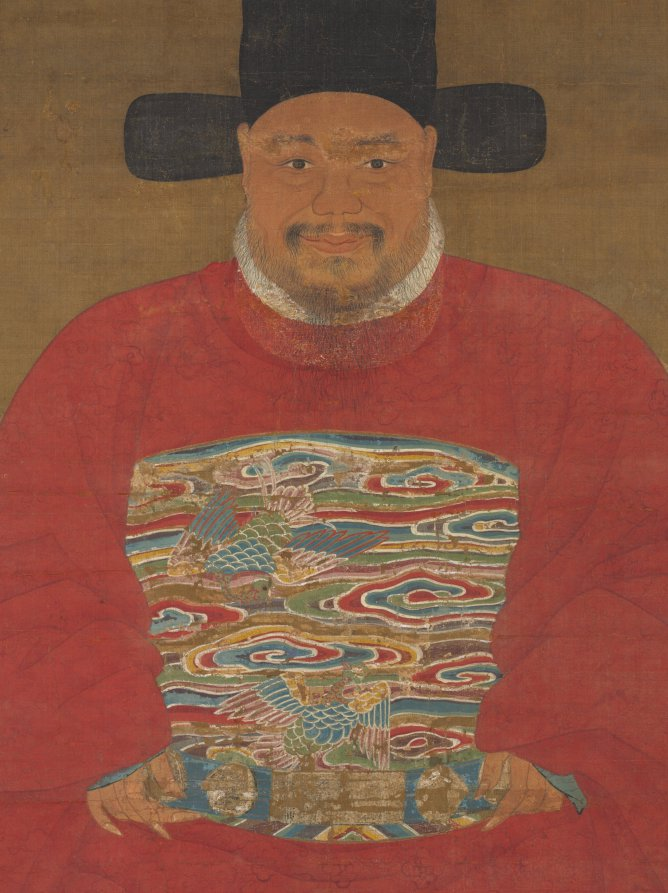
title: Portrait of an Official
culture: China, Ming dynasty (1368-1644) - Qing dynasty (1644-1911)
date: 1600s–1700s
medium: hanging scroll; ink and color on silk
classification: Painting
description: This official's portrait was done in the portrait painting style of the Ming dynasty.